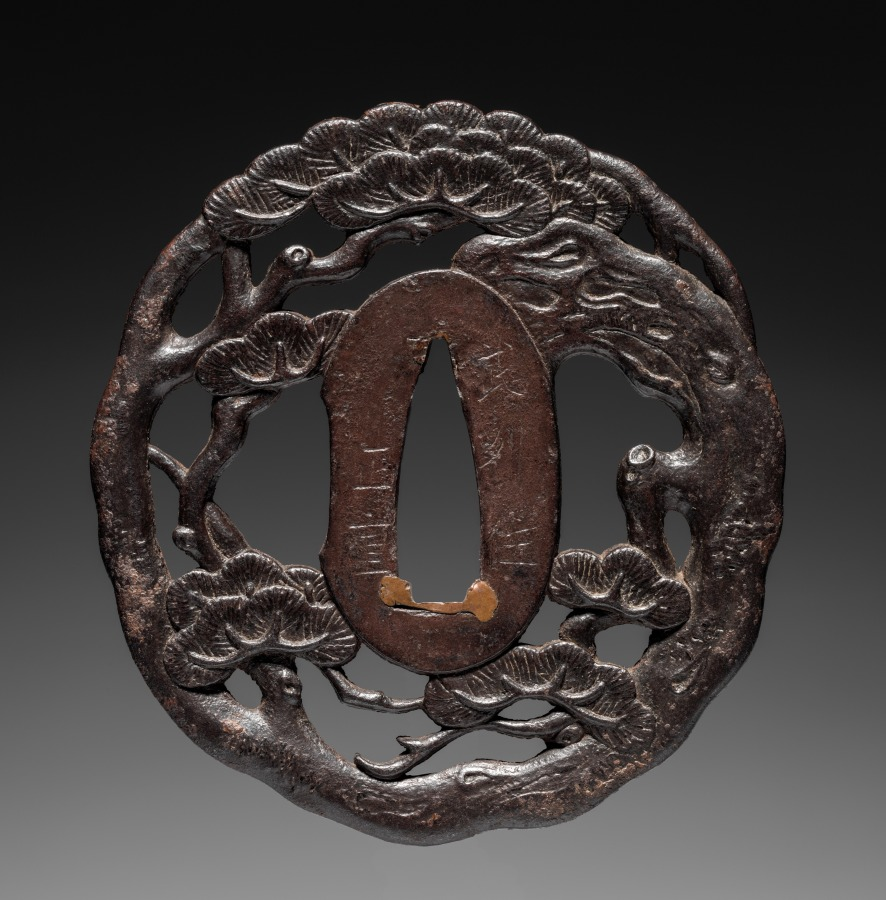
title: Sword Guard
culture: Japan, Edo period (1615–1868)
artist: Masashige (Japanese)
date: late 1700s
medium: iron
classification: Arms and Armor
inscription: Signature: Masashige, residing in Musashi province